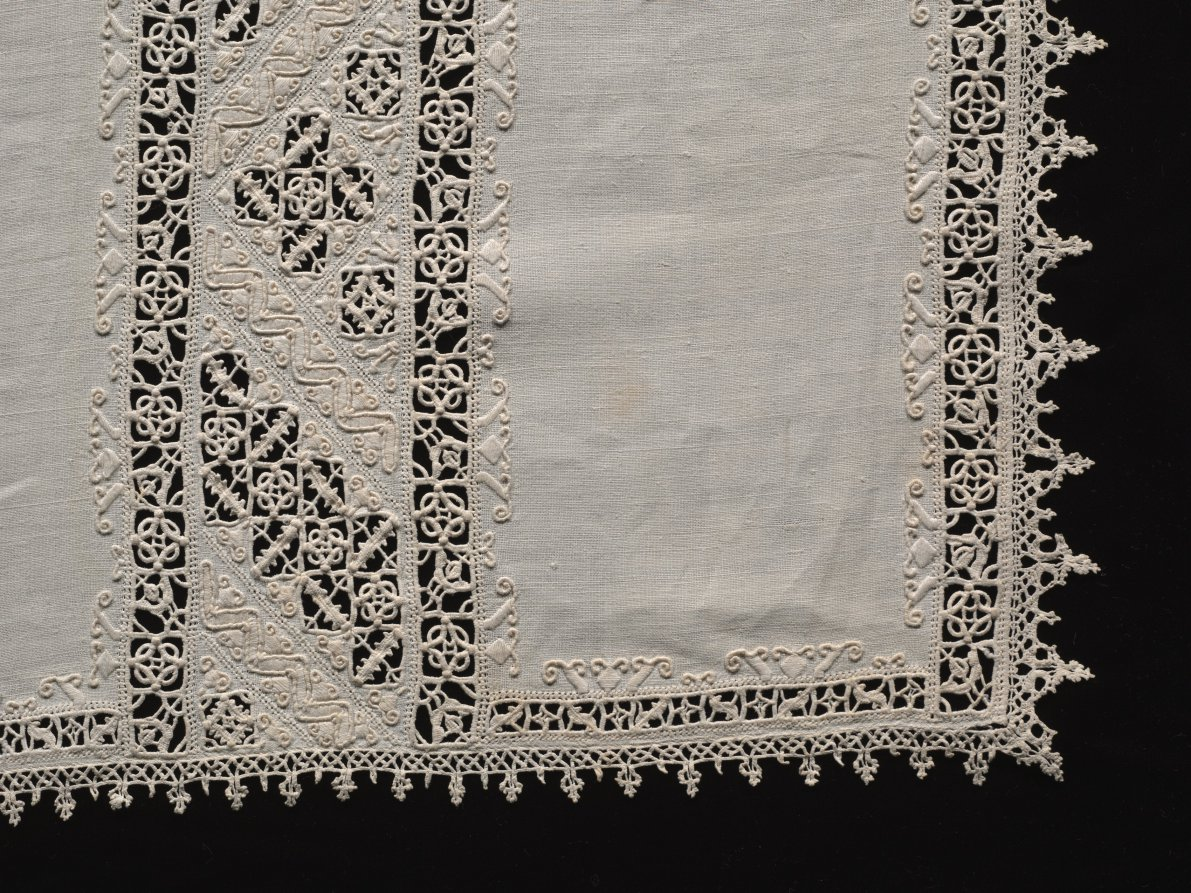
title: Lace Cloth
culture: Italy, Padua and Venice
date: 1500s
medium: Linen: needle lace (cutwork), bobbin lace, and embroidery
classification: Lace